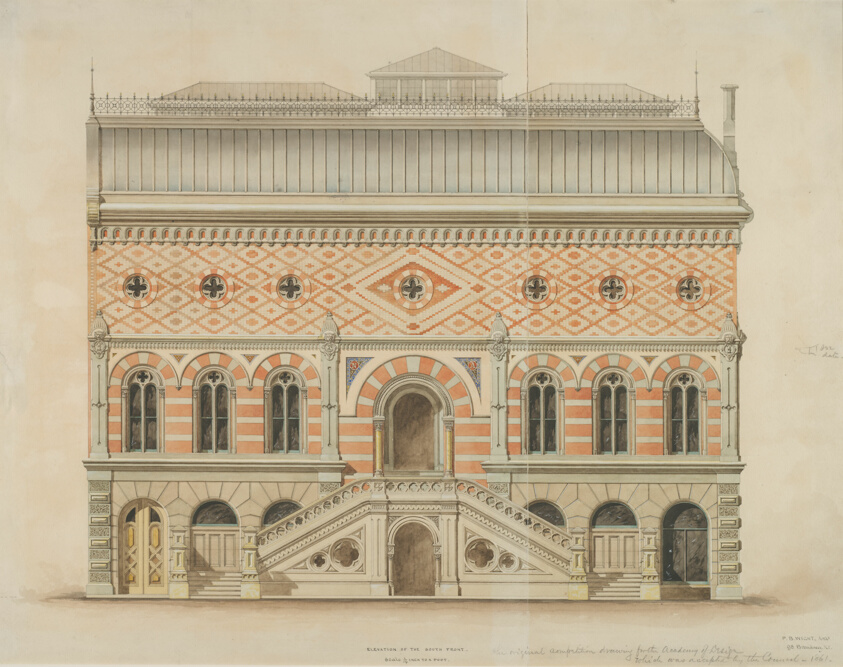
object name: Architectural Drawing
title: National Academy of Design Competition, New York, New York, South Elevation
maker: Peter Bonnett Wight (American, 1838–1925)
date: 1861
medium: Ink, watercolor, and gouache on paper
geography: New York City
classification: presentation drawing; architectural drawing